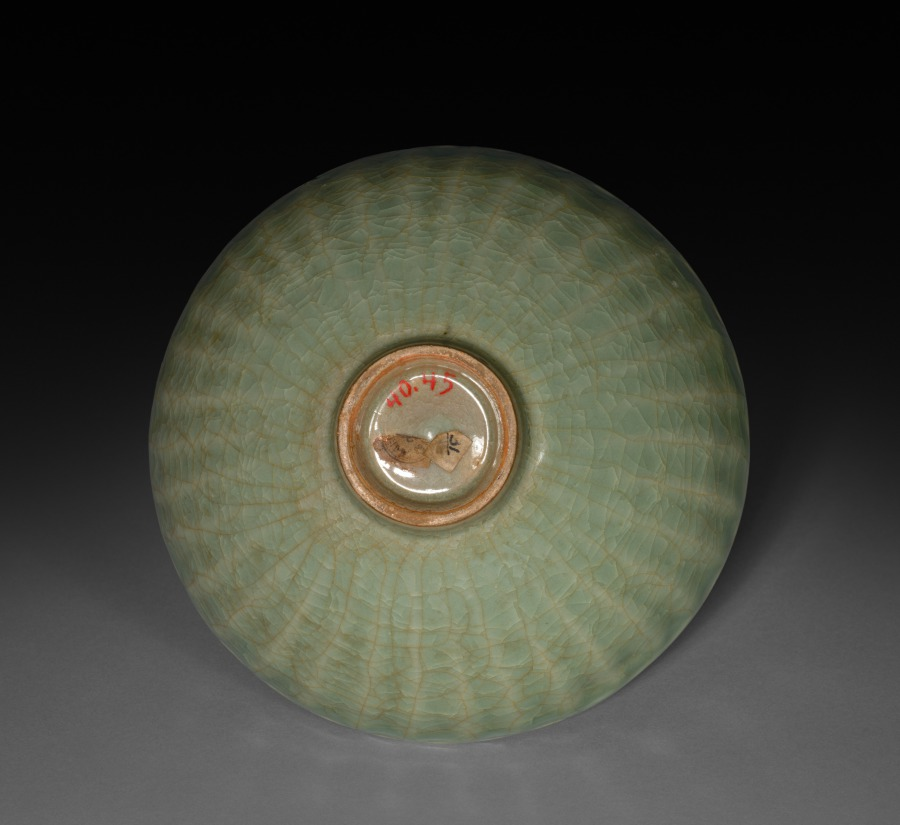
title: Bowl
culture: China, Southern Song dynasty (1127-1279)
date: 1200s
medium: glazed buff stoneware, Southern Celadon ware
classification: Ceramic